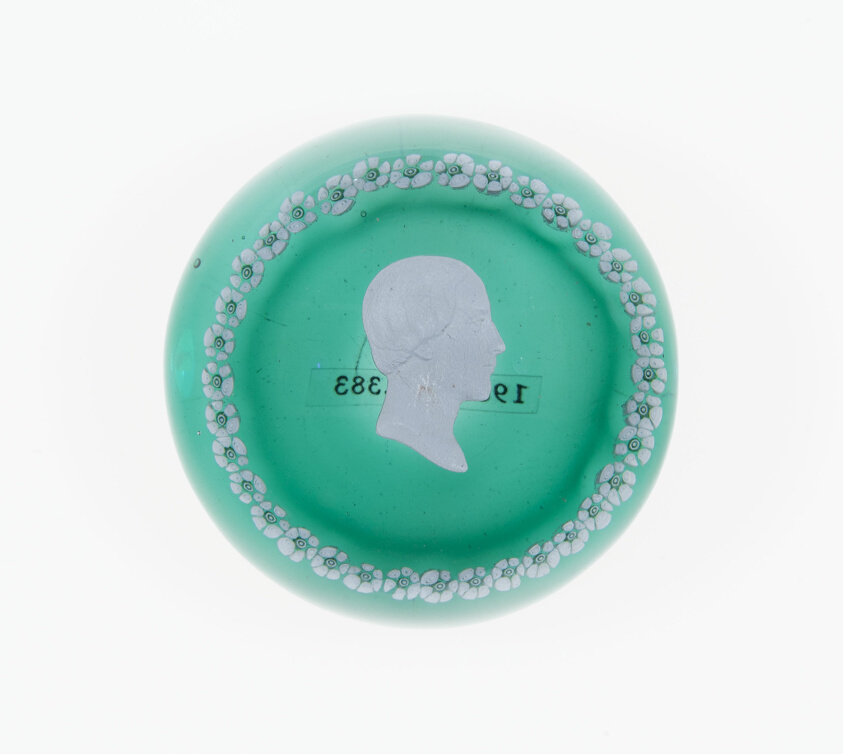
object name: Glass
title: Paperweight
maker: Clichy Glassworks (Cristalleries de Clichy); Clichy, France, 1837-1885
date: Mid 19th century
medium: Glass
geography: Clichy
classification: paperweight; glass